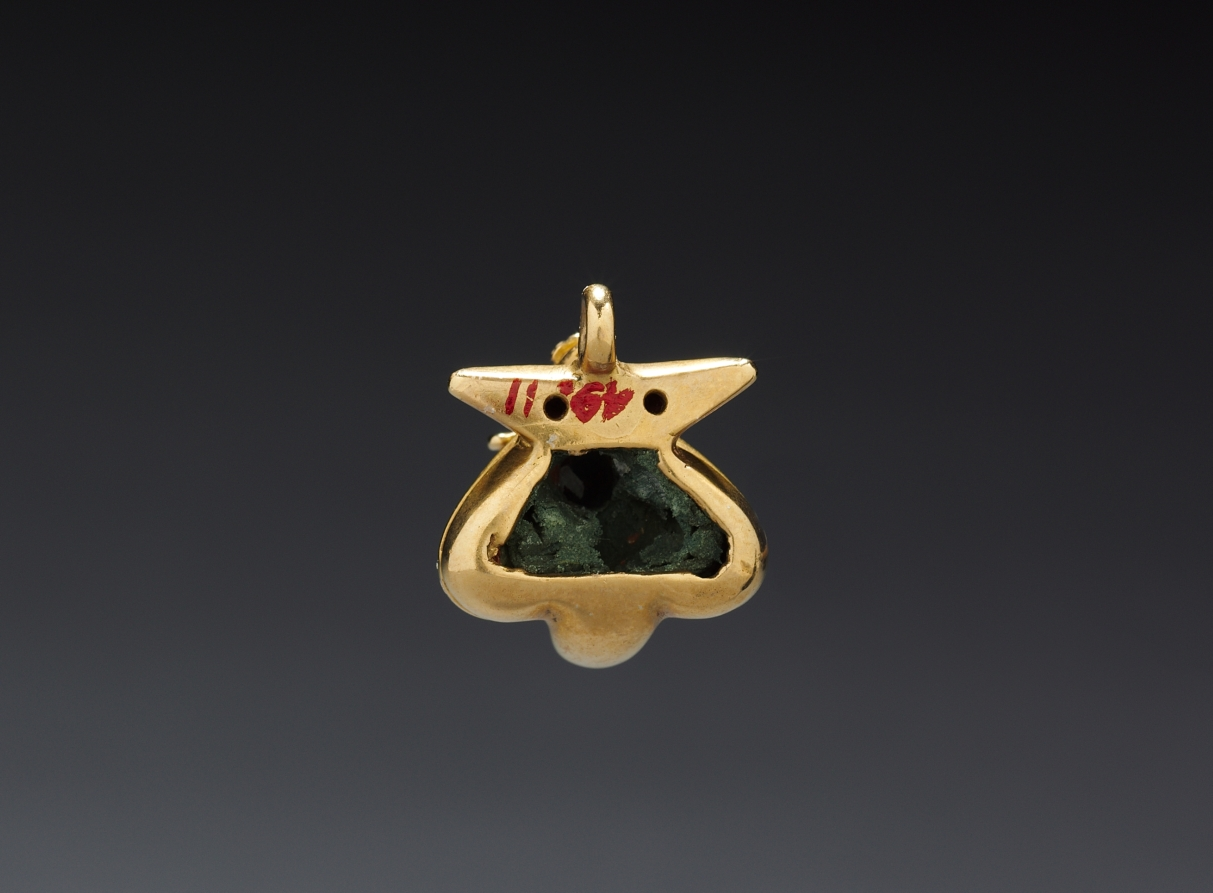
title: Pendant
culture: Panama, International Style, 5th-7th century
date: 400–700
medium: cast gold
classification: Metalwork